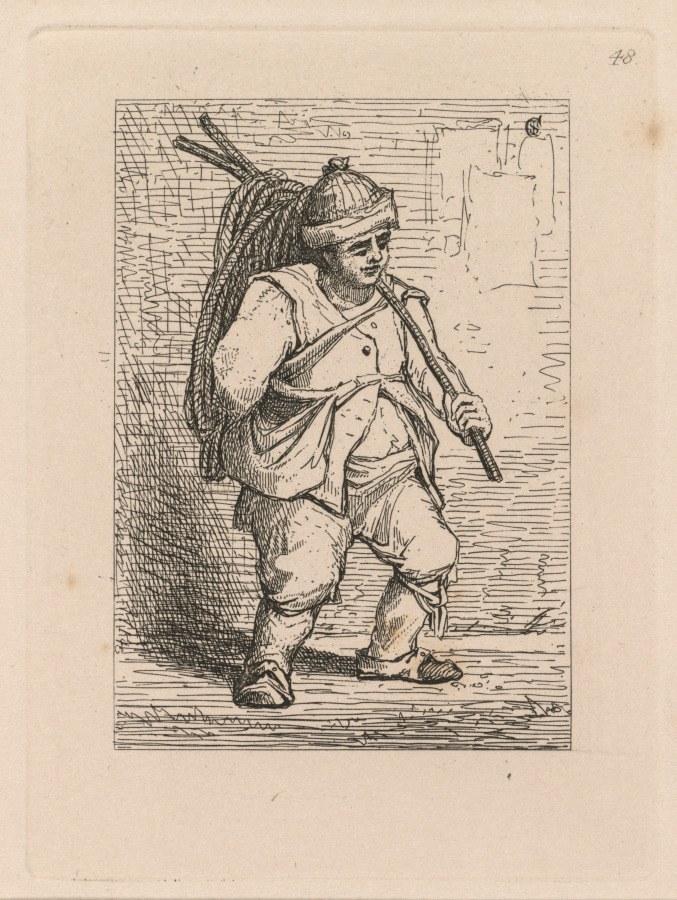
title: Liber Studiorum: Plate 48, A Study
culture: England, 19th century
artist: John Sell Cotman (British, 1782–1842)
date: 1838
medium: etching, from a bound volume containing 48 plates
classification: Bound Volume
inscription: In plate, above image, upper right: 48; upper right, within image, monogram: JSC